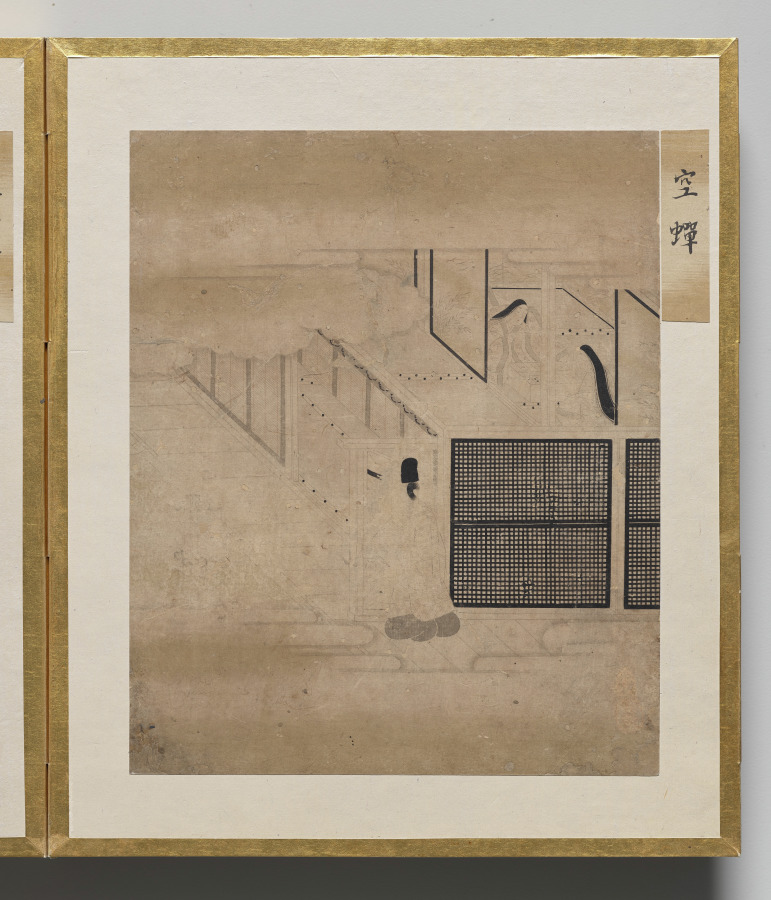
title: Shell of the Locust from Album of Illustrations for the Tale of Genji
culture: Japan, Edo period (1615–1868)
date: 1600s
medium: painting in an accordion-style album; ink, light color, and gold on paper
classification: Bound Volume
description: This album contains illustrations for the classic literary work the Tale of Genji, authored in the 1000s by Murasaki Shikibu, an aristocrat of the Heian period (794–1185) court. The scenes are painted in the “white drawing” (hakubyō) mode, in which a fine ink line is used to depict figures and spaces with great subtlety, punctuated only occasionally by traces of red pigment for a character’s lips, a detail of a garment, or a decorative element. These two scenes illustrate episodes from the chapters “Thin Veil of Cloud” (Usugumo) and “Barrier Gate” (Sekiya).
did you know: The illustrations are identified by chapter title in cartouches to the upper right of the paintings.